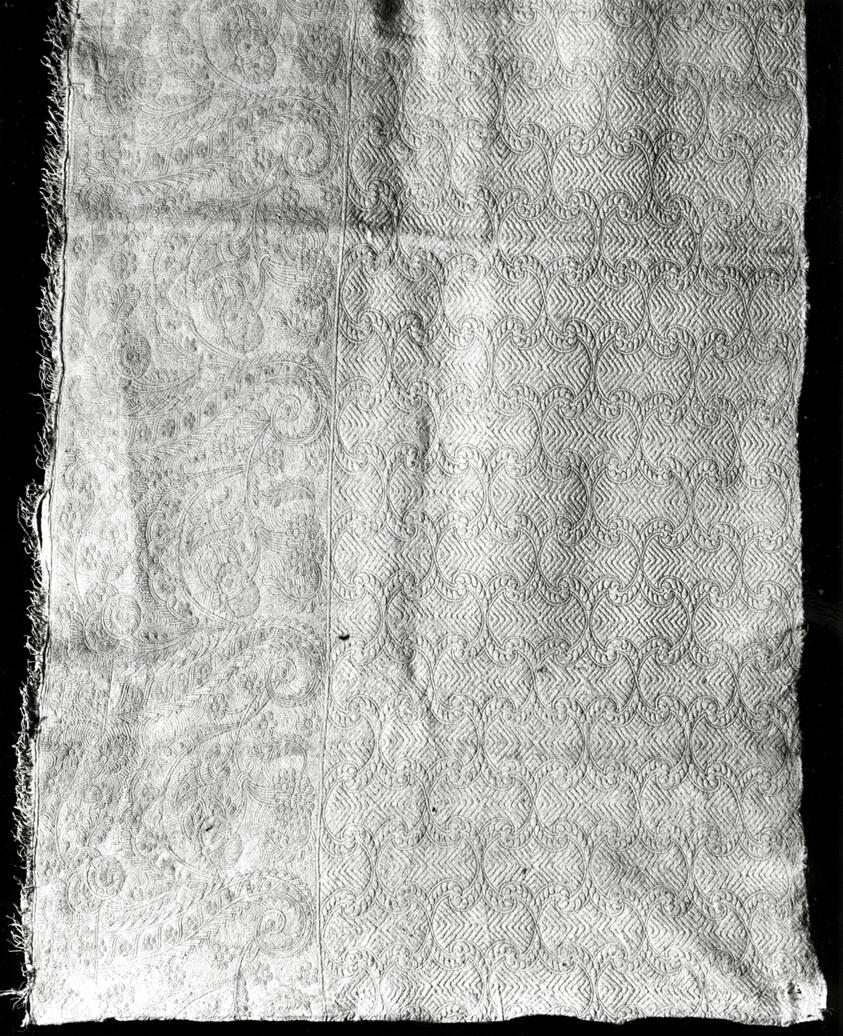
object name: Textile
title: Panel of a Skirt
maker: France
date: 1775/1825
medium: Silk, plain weave; embroidered with silk floss in back and running stitches; quilted; silk fringe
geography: France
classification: textile; needlework (visual works); costume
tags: fashion